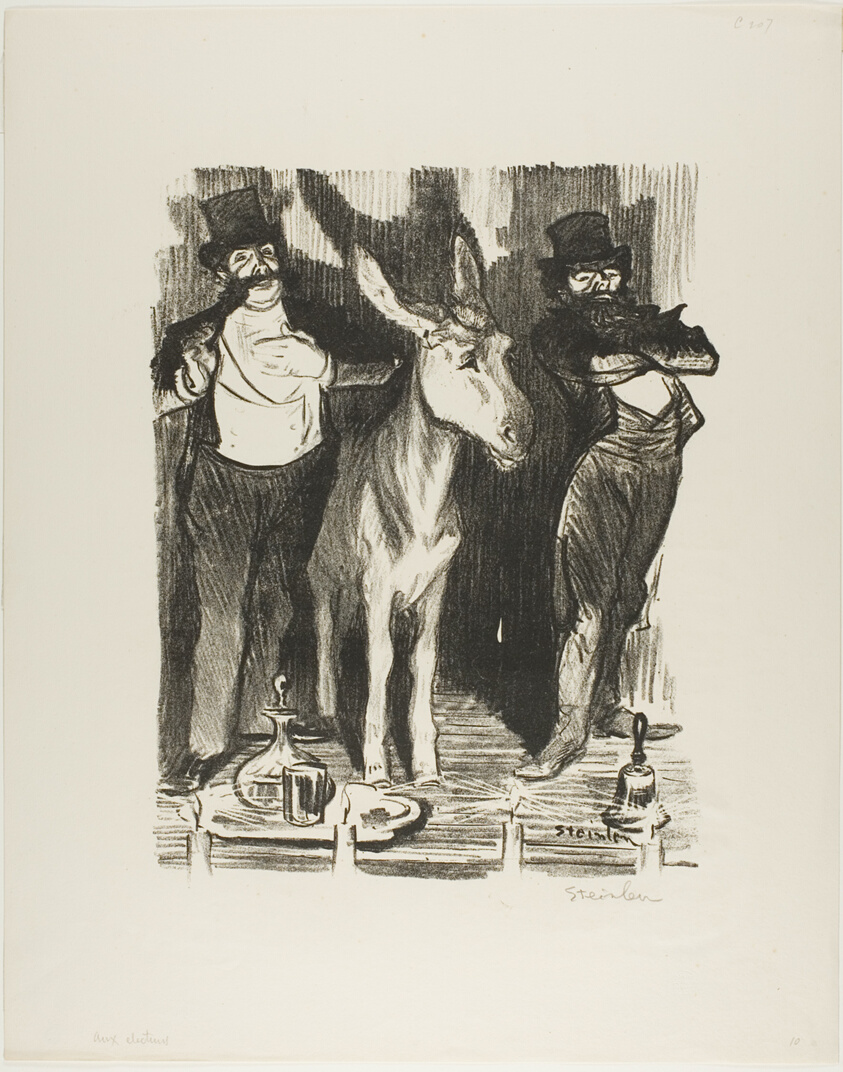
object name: Print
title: To the Electors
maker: Théophile-Alexandre Steinlen; French, born Switzerland, 1859-1923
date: May 1898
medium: Lithograph in black on ivory wove paper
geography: France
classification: lithograph; print; prints and drawing